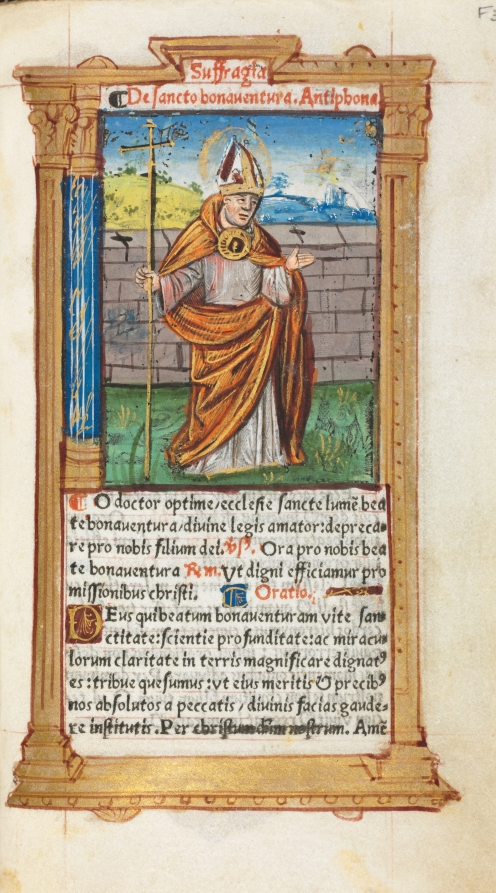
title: Printed Book of Hours (Use of Rome): fol. 107r, St. Bonaventura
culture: France, Paris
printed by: Guillaume Le Rouge (French, Paris, active 1493–1517)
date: 1510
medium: 112 Printed folios on parchment, bound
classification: Bound Volume